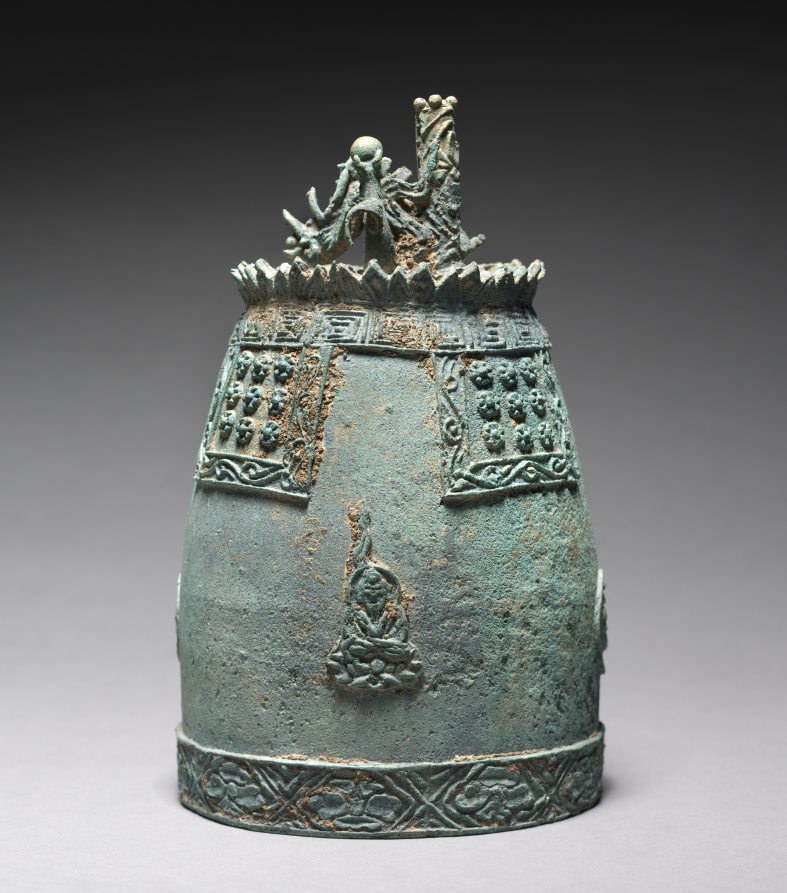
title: Bronze Ritual Bell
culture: Korea, Goryeo dynasty (918–1392)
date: 1226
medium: cast bronze with incised inscription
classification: Metalwork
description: This miniature bell was once used as part of Buddhist indoor rituals. Likely suspended in a Buddhist temple, it features a cast dragon and a vertical tube to amplify the sound on top, and is decorated with Buddhist figures seated on lotuses. The echoing sound of the bell was thought to help Buddhist believers understand the significance of transience and impermanence; the sound instantly fades away as soon as one hears it. This sensory experience creates a striking conceptual parallel with Buddhist teachings, including the idea that all things and beings exist merely in our perception or imagination. An inscription indicates it was cast in the year of the dragon and took three years to make.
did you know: The inscription informs us that this miniature indoor bell was produced in 1226.